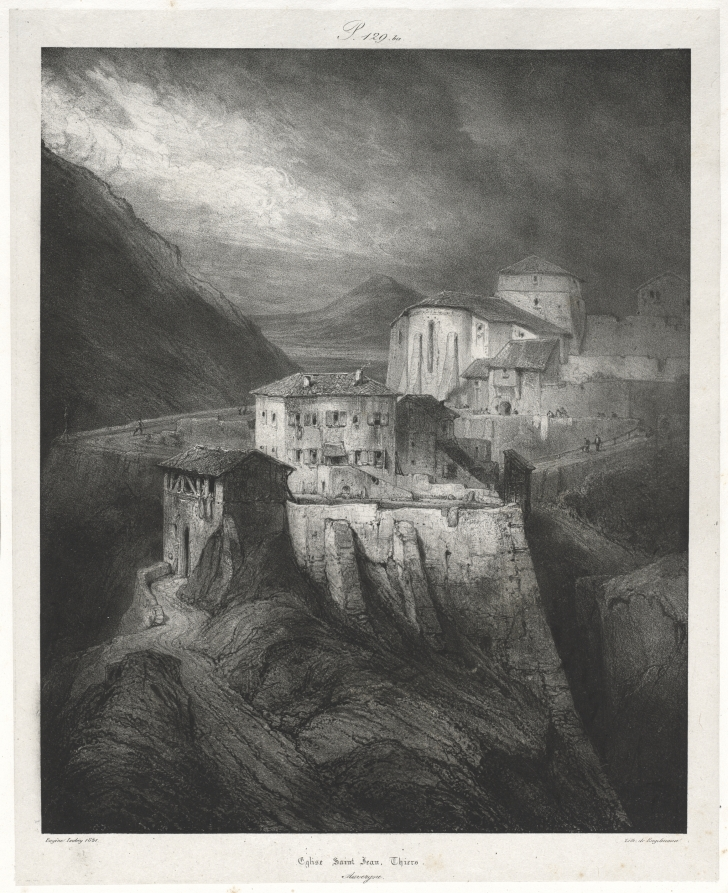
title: Picturesque and Romantic Journeys in Old France: Auvergne (vol. II): St. John Church, Thiers, Plate 129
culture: France, 19th century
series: Plate 129 from Voyages Pittoresques...Auvergne vol. II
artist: Eugène Isabey (French, 1803–1886)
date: 1831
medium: lithograph on chine collé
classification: Print